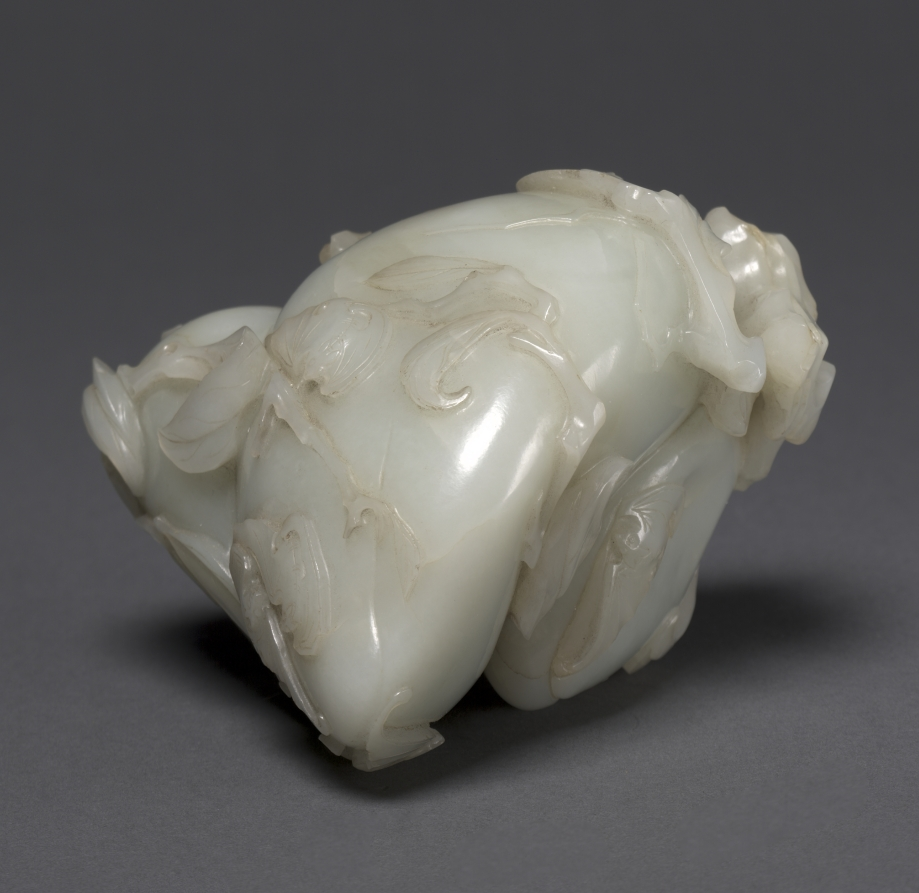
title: Peaches and Bats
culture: China, Qing dynasty (1644–1911)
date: late 1600s–1700s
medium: greenish-white jade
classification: Jade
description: This white jade is carved as a double peach with realistically detailed leaves and branch following the curve of the jade. Clinging to the edge are a pair of bats, which represent good fortune.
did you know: This jade sculpture was given to the museum in memory of John D. Rockefeller and his family.